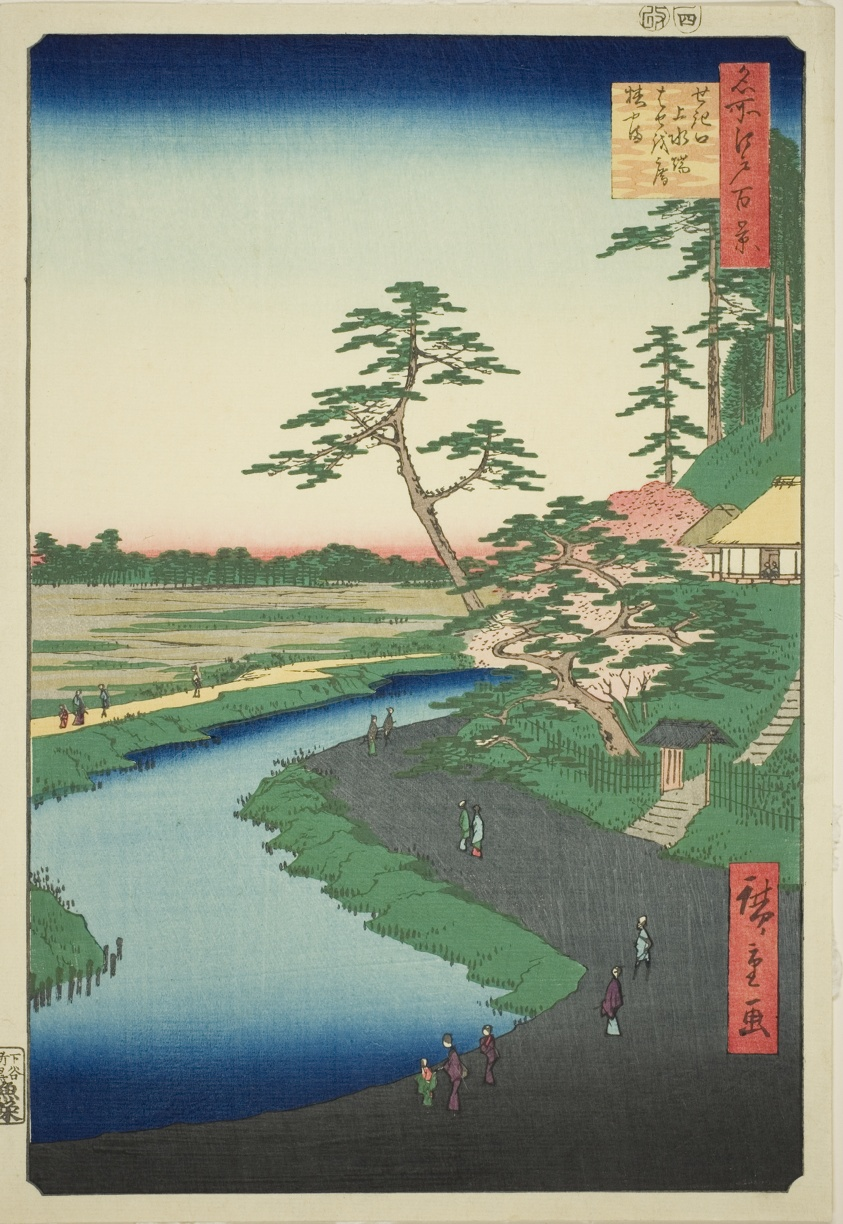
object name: Print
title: Basho's Hut on Camellia Hill Beside the Aquaduct at Sekiguchi (Sekiguchi josui-bata Bashoan Tsubakiyama), from the series "One Hundred Famous Views of Edo (Meisho Edo hyakkei)"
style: Japanese (culture or style)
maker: Utagawa Hiroshige 歌川 広重; Japanese, 1797-1858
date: 1857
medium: Color woodblock print; oban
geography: Japan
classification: woodblock print; print; asian art